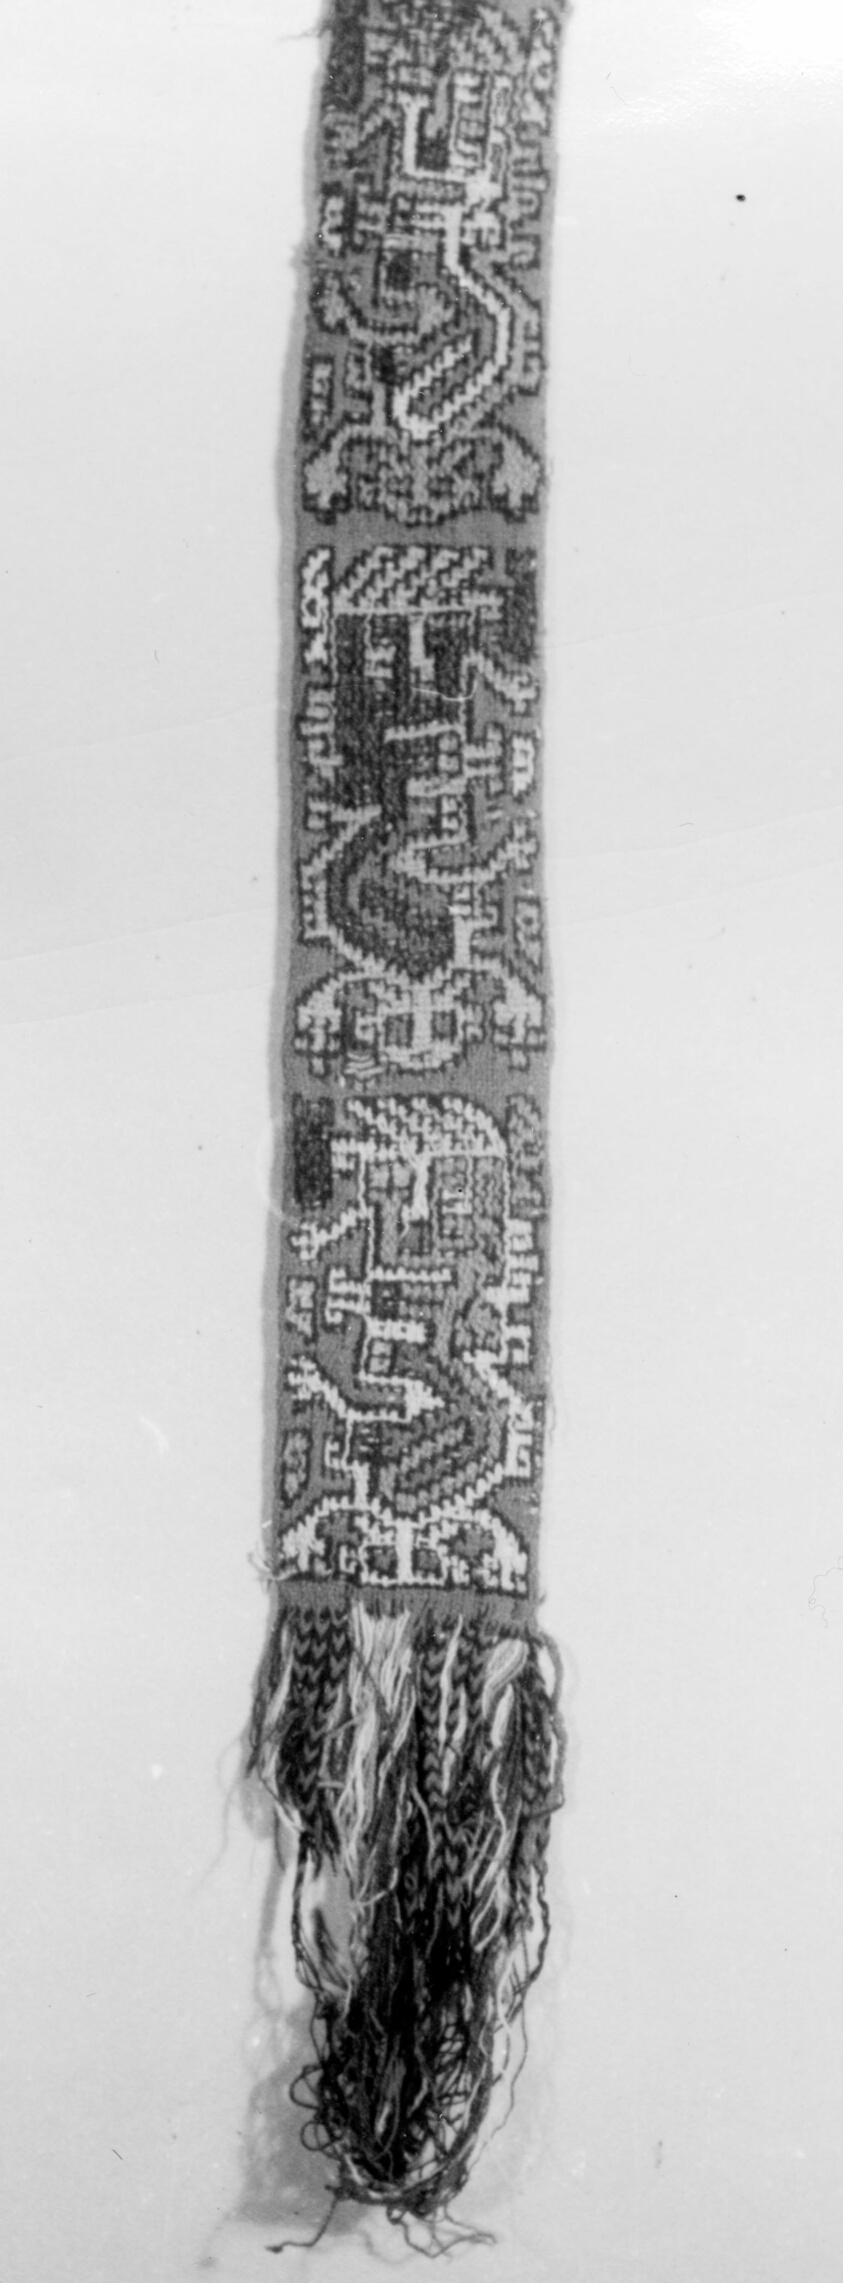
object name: Textile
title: Band Fragment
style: nazca, andean, andes, Pre-Columbian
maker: Nazca-Wari; Probably south coast, Peru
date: A.D. 700/900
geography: Peru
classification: textile; weaving